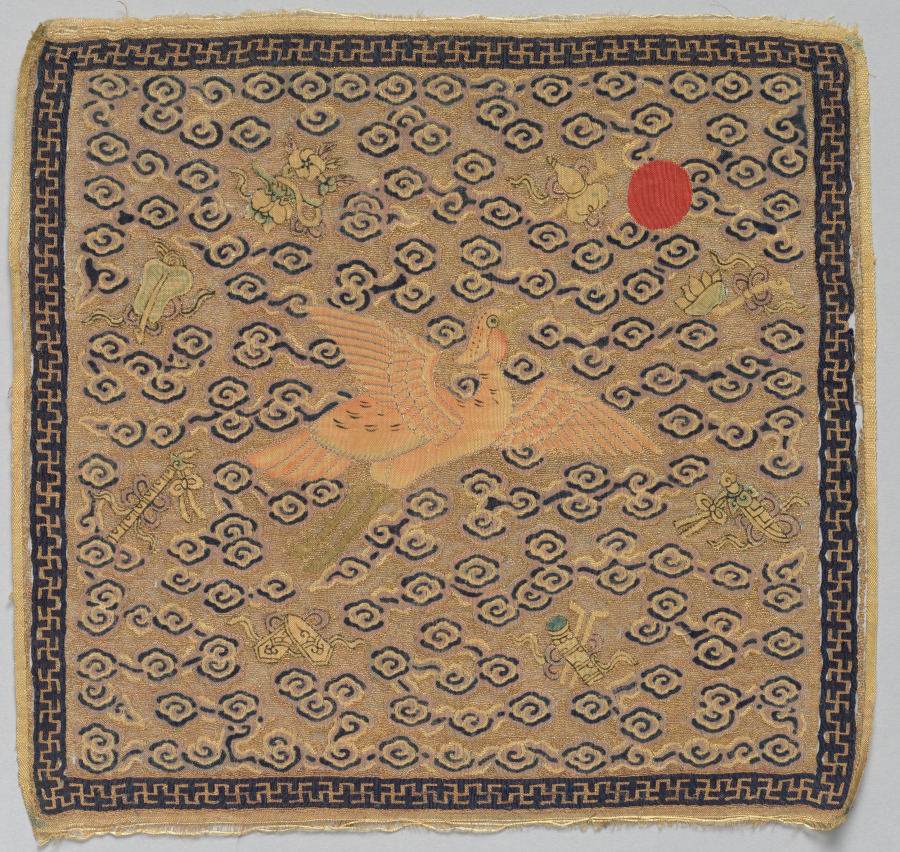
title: Rank Badge (buzi)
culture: China, Qing dynasty (1644-1911)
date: 1850–99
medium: silk and metal thread; slit tapestry weave (kesi)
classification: Textile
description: Rank badges (also called rank insignia or Mandarin squares) were used in China during the Ming (1368–1644) and Qing (1644–1911) dynasties to demonstrate the wearer’s rank. In 1391 new clothing regulations directed court officials to wear decorative squares indicating their rank—birds for civil officials and animals for military officials. During the Qing dynasty rank badge design was regulated, and certain creatures were associated with specific ranks. Qing badges depict a representation of the universe with a landscape and a central creature, surrounded by clouds and facing the sun. The sun represented the emperor and this composition showed the official’s loyalty to him. An official’s wife wore rank badges that mirrored her husband’s. Most of the examples in CMA’s collection depict creatures facing a sun on the left. Attached to the front and back of a ceremonial robe, rank badges were woven in pairs with identical imagery. One was divided vertically up the center to attach to the front of a robe with a center opening. Rank badges are generally square or rectangular, although round examples exist. They are typically satin weave or slit tapestry weave (kesi) silk. Satin weave badges often have dark backgrounds with silk and/or metal thread embroidery. Some badges incorporate peacock feathers or beads. Late in the Qing dynasty appliqué replaced embroidery to allow for quicker production and a change in rank.